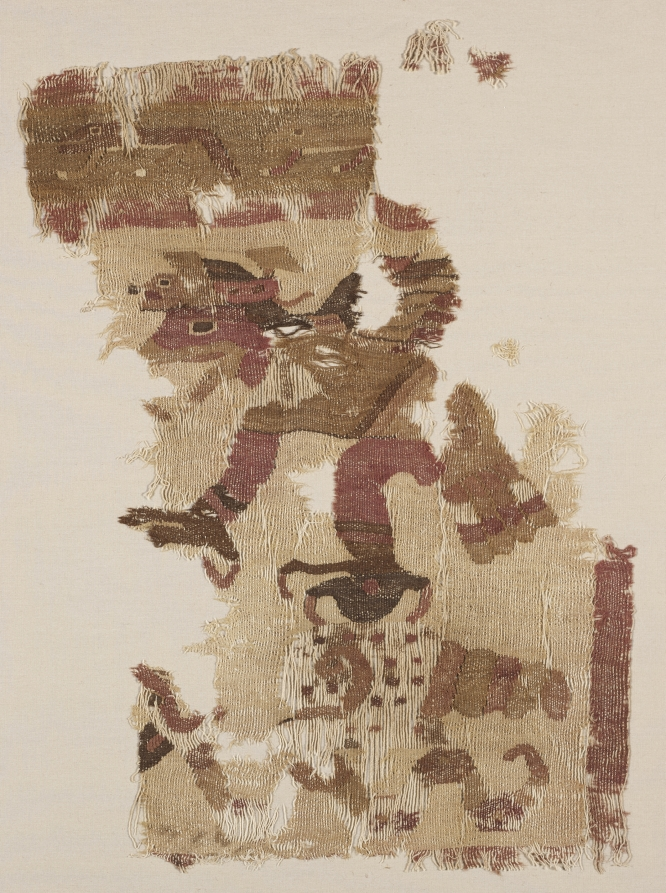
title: Textile Fragment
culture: Peru, Moche, north coast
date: c. 50–650 CE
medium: cotton and camelid fiber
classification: Textile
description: This fragment, one of several in the collection, is a rare survivor of catastrophic rains that destroyed much of the Moche textile legacy and may have helped to bring about the decline of Moche culture. It depicts a serpent and a snail beneath a hovering raptorial bird—perhaps a snail kite, a type of hawk named after its favored food. The size of the motifs implies that the original textile was large; a mantle (a shawl-like garment) or a hanging are among the possibilities.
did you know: This fragment is a rare survivor of floods that destroyed much of the Moche textile record.